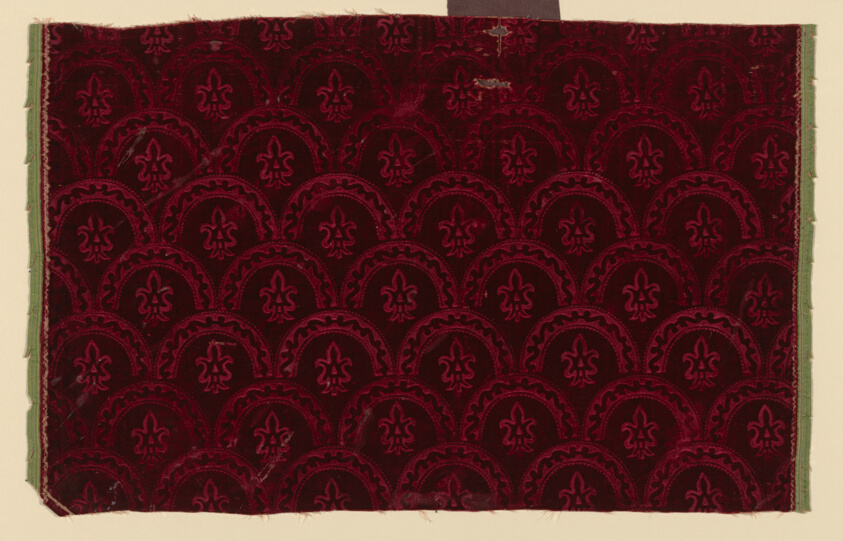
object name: Textile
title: Fragment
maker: Italy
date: 1601/35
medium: Silk, warp-float faced broken twill weave with supplementary pile warps forming cut, solid velvet; stamped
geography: Italy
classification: textile; weaving - velvet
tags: fashion